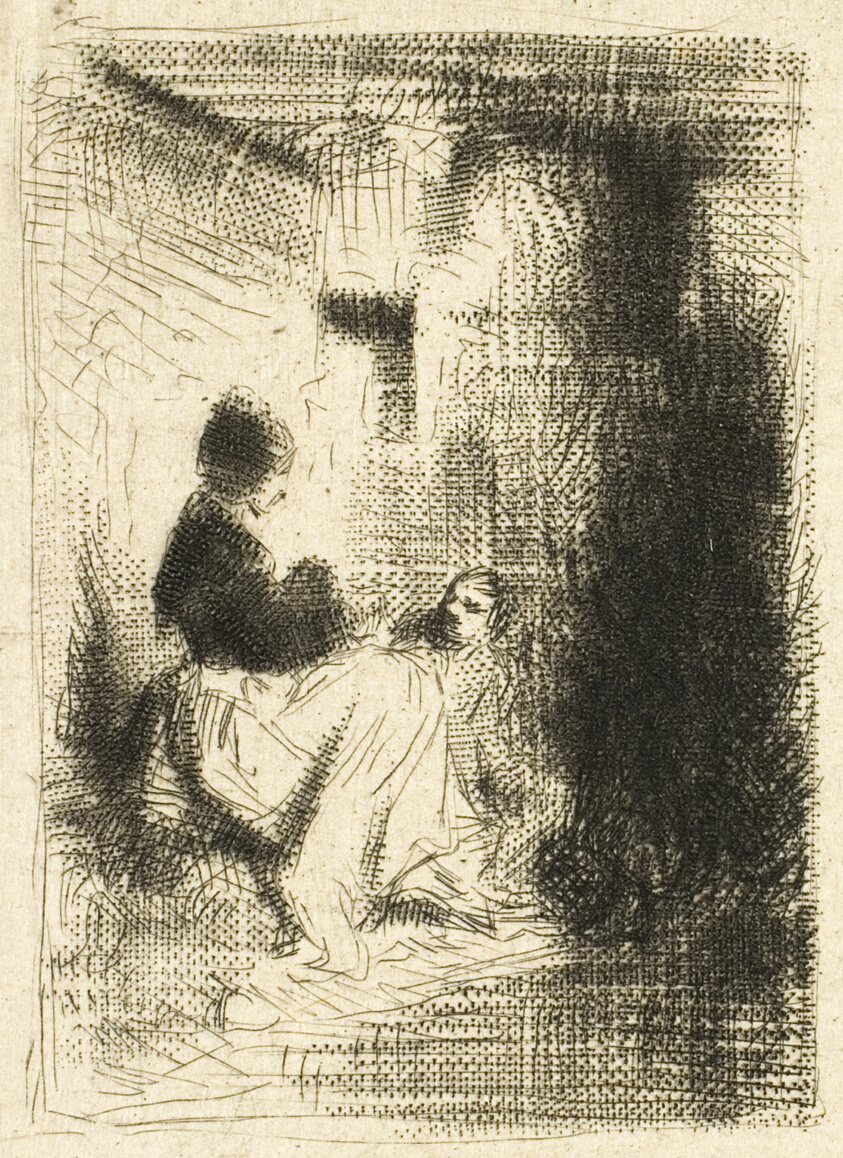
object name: Print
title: Woman and her Children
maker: Charles Émile Jacque (French, 1813-1894)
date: c. 1843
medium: Drypoint and roulette on ivory wove paper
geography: France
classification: drypoint; print; prints and drawing